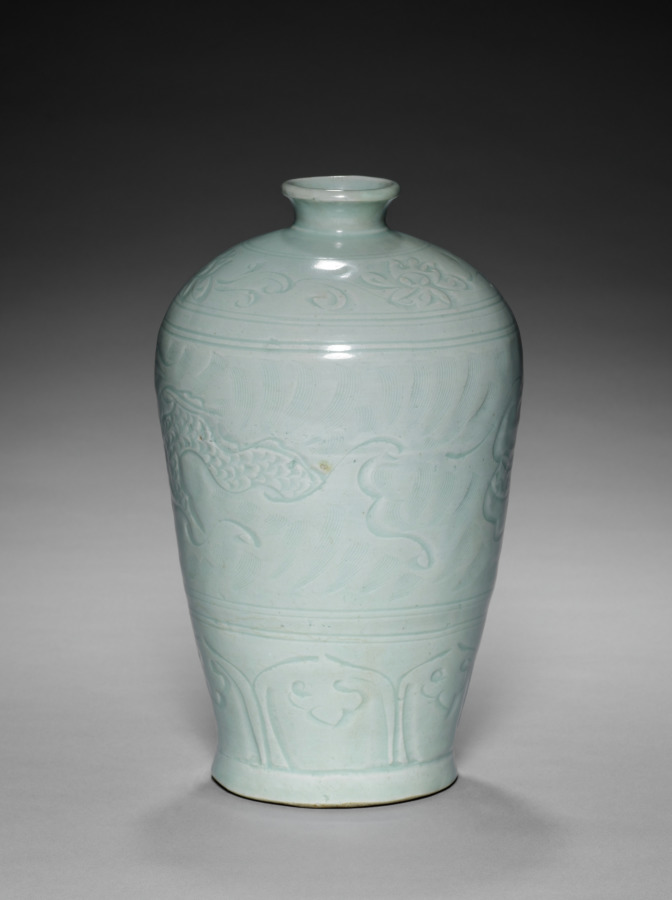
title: Meiping Vase with carved Dragon Motif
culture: South China, Yuan dynasty (1279–1368)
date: 1300s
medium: Porcelain with pale bluish-white (qingbai; 青白) glaze and carved decoration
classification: Ceramic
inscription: There are multiple self-adhesive labels on the bottom: 1. Square white (now yellowed with age) label with "90" written in red ink. 2. White rectangular label with "L.80.17.8" written in pencil. 3. Fabric tape cut to rectangular shape with "L.2161.49 /39" written in black ink. 4. White round label from Lally & Co. New York with "X2295" written in black ink.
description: A fierce coiling dragon chasing a pearl amid mist and clouds—a symbol of fertility and power—decorates this sturdy vase. Its shoulder is incised with a band of lotus flowers and the base features a border of lotus petals. Meiping, literally prunus vase, derives its name from being used to display a single floral spray, traditionally a branch of blossoming plum (or prunus), apricot, or cherry.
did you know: In Chinese mythology, the dragon is believed to transport human souls to the heavens after death.